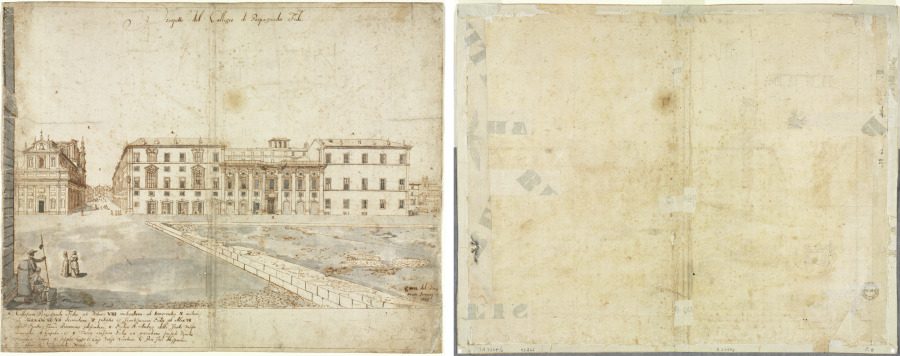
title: Eighteen Views of Rome: The Collegio di Propaganda Fide (recto); Sketches of Windows and Pilasters of the Attic Storey of the Collegio di Propaganda Fide (verso)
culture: Flanders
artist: Lievin Cruyl (Flemish, c. 1640-c. 1720)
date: 1665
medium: pen and brown ink and brush and gray wash over graphite; framing lines in brown ink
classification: Drawing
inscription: recto: signed, lower right, in brown ink: [artist's monogram: LC] RVYL del: Romæ / mense Januarij / 1665. ; by artist, upper center, in brown ink: Prospetto del Collegio di Propaganda Fide. ; by artist, throughout composition, in brown ink: [the letters A-H] ; by artist, lower left, in brown ink: A. Collegium Propagandæ Fidei ab Urbano VIII inchoatum, ab Innocentio X auctum, / ab ALEXAN[D]RO VII decoratum. B. Introitus et Frontispicium Eccliæ ab Alex: VII / operâ Equitis Frañci Borrommo edificatum. C. Ecclia S. Andreæ dellé Fratte vulgo / nominata. D. Cupula , et E Turris eiusdem Eccliæ ex inventione prefati Equitis. / F. Templum Mon~rij S. Josephi Capo le Case vulgo vocatum. G. Pars Fori Hispanici. H. Templum SS. Trinitiatis Montium. verso: upper left, in brown ink: S45[masked] ; upper right, in graphite(?): me[illegible, sideways] ; center, in graphite(?): [illegible] / me[illegible] ; ON PAPER STRIP MOUNTED TO PERIMETER, lower center, in graphite: A20976 ; lower right, in graphite: E. 8